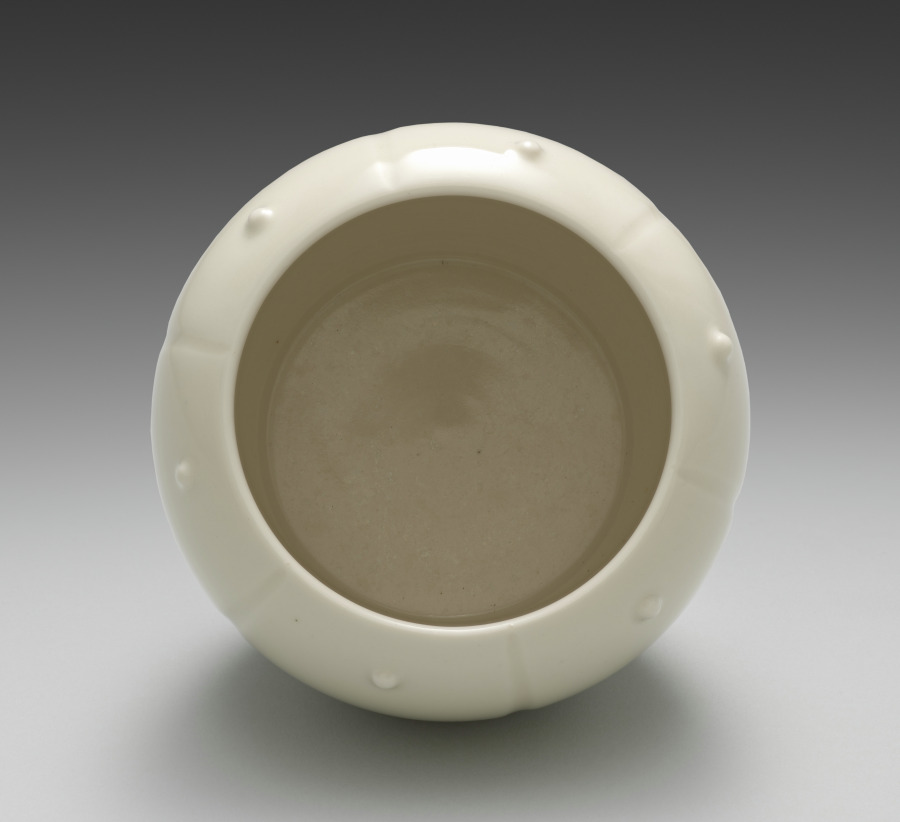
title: Container from Lit Charcoal and Ash Containers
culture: Japan, Meiji period (1868–1912)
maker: Seifū Yohei III (Japanese, 1851–1914)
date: 1893–1914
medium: One from a set of four containers; porcelain with molded design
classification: Ceramic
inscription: 清風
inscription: The storage box for this set is inscribed and impressed with seals.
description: The box lid for these six-lobed lit charcoal and ash containers, or hiire, identifies them as kōhakuji, another of Yohei III’s translucent cream colors over ivory clay bodies. One might translate the name as “lustrous pearl[–glazed ivory] porcelain.” A hiire was filled with ash with burnt coals at the center so that embers and tobacco ash could be discarded safely during a gathering. Each of the lobes on the containers has a round protrusion set below the rim. The studlike pattern is called ruiza. The term is also used to describe the pattern that rings the shoulder of some flower vases or metal kettles used in chanoyu.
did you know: The Seifu studio generally followed the standard practice in Japan for identifying the artist and object in box inscriptions.